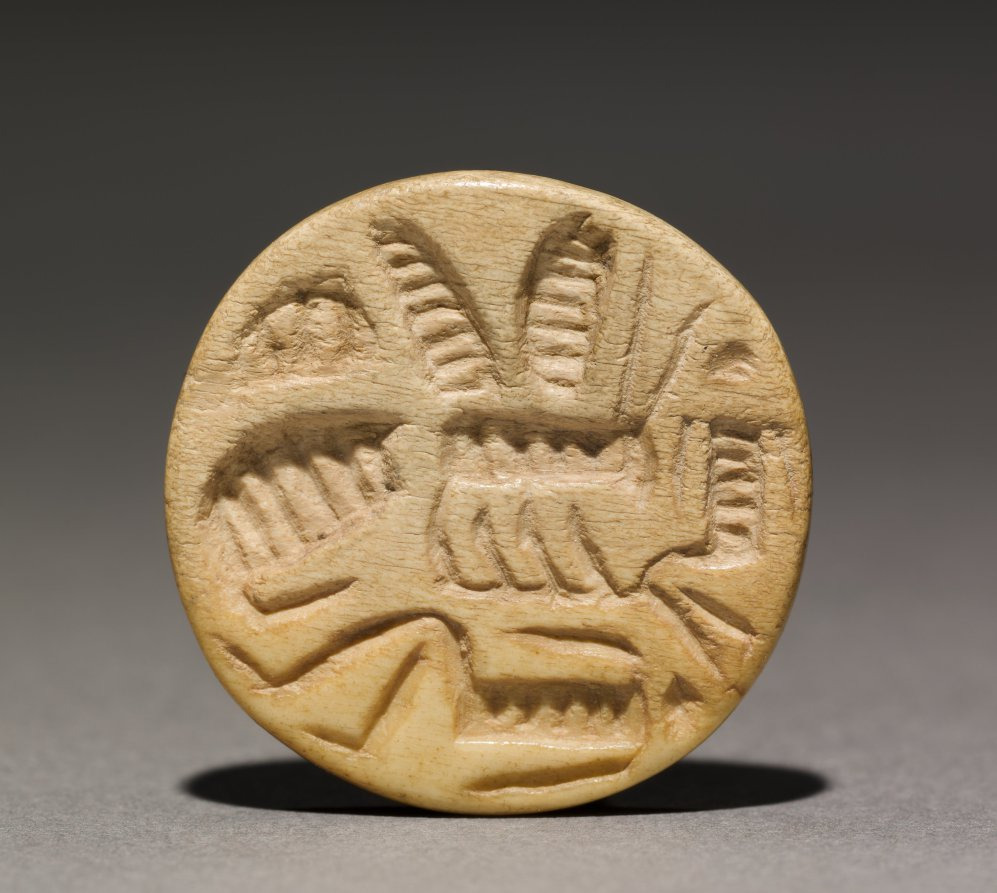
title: Seal Amulet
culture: Egypt, Old Kingdom (2647–2124 BCE), Dynasties 6–8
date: 2311–2140 BCE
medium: bone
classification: Amulets